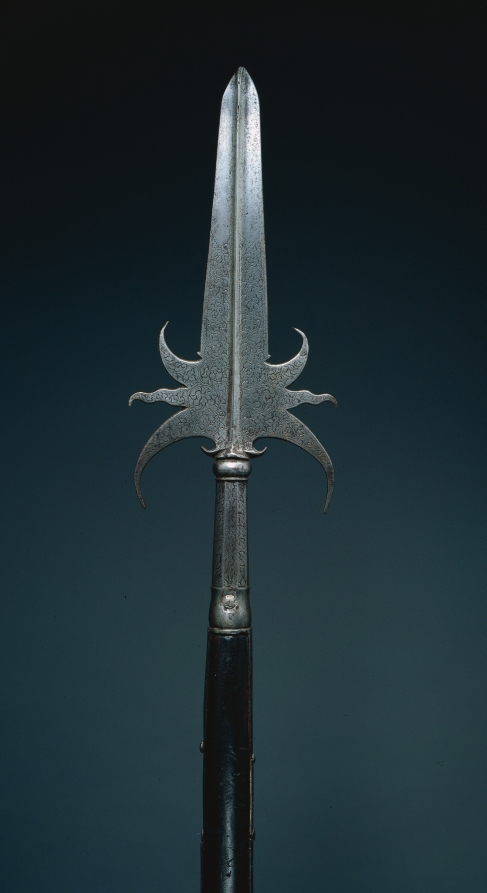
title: Partisan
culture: France, 17th century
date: c. 1650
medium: steel; round wood haft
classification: Arms and Armor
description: The partisan, a staff weapon with a symmetrical head, was carried by infantry officers and members of princely bodyguards during the 1600s and 1700s.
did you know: The ceremonial use of staff weapons continues to this day by the Swiss Guards at the Vatican.